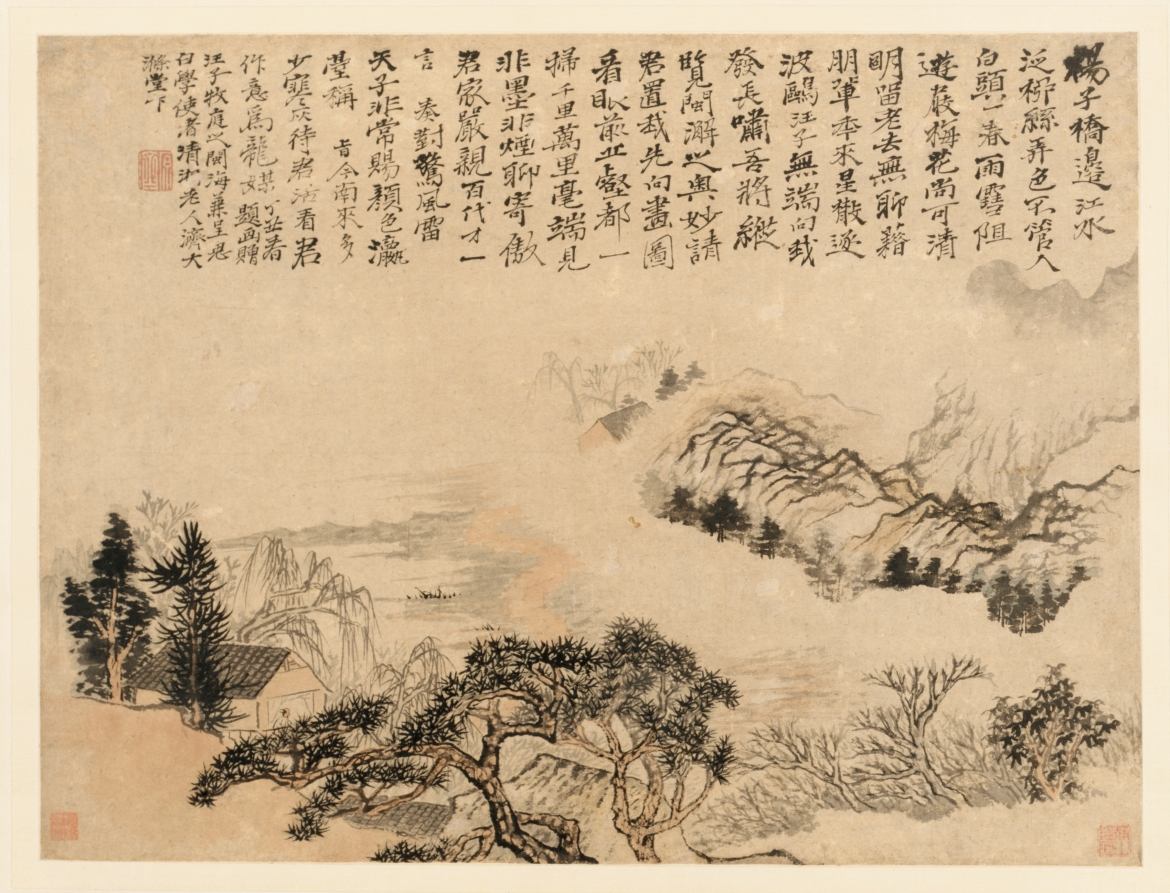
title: Spring Mist over Jiangnan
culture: China, Qing dynasty (1644-1911)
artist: Shitao (Chinese, 1642–1707)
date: 1697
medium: Hanging scroll; ink and light color on paper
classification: Painting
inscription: 揚子橋邊江水泛，柳絲弄色不管人白頭。/ 一春雨雪阻遊屐，梅花尚可清明留。/ 老去無聊藉朋輩，年來星散隨波鷗。/ 汪子無端向我發長嘯，吾將縱覧閩澥之奧妙。/ 請君置我先向畫圖看，眼前丘壑都一掃。/ 千里萬里毫端見，非墨非煙聊寄傲。/ 君家嚴親百代才，一言奏對驚風雷。/ 天子非常賜顏色，灜台稱旨今南來。/ 多少寒灰待君活，看君作意為龍媒。 丁丑春題畫，贈汪子牧庭之閩海。兼呈思白學使。清湘老人濟大滌堂下。[印]原濟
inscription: 2 colophons and 7 additional seals: 1 colophon and 4 seals of He Yuanyu 何瑗玉 (1840-?); 1 colophon and 2 seals of Li Xinhui (19th-20th c.); 1 seal unidentified.